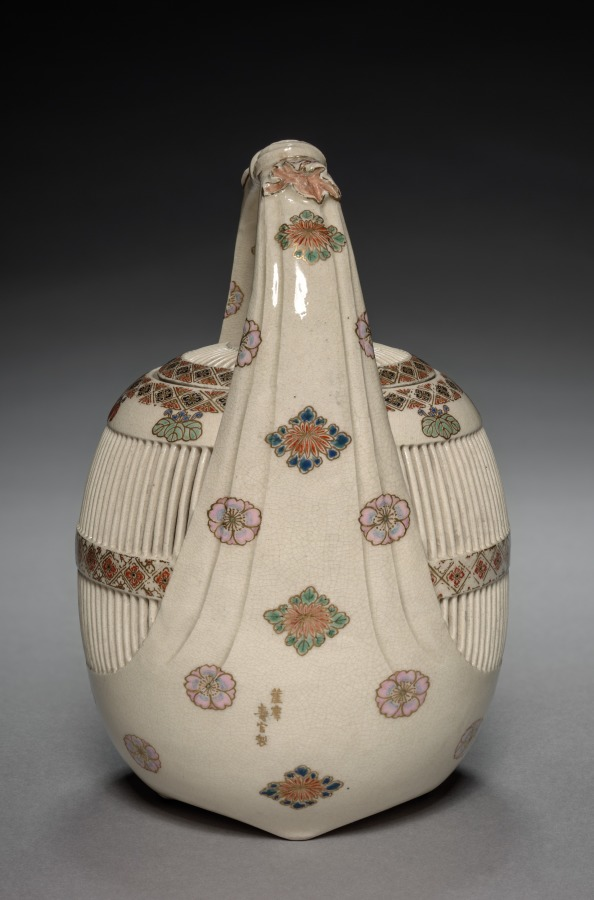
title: Jar: Satsuma Ware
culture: Japan, Edo period (1615–1868)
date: early to mid-1800s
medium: pottery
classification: Ceramic